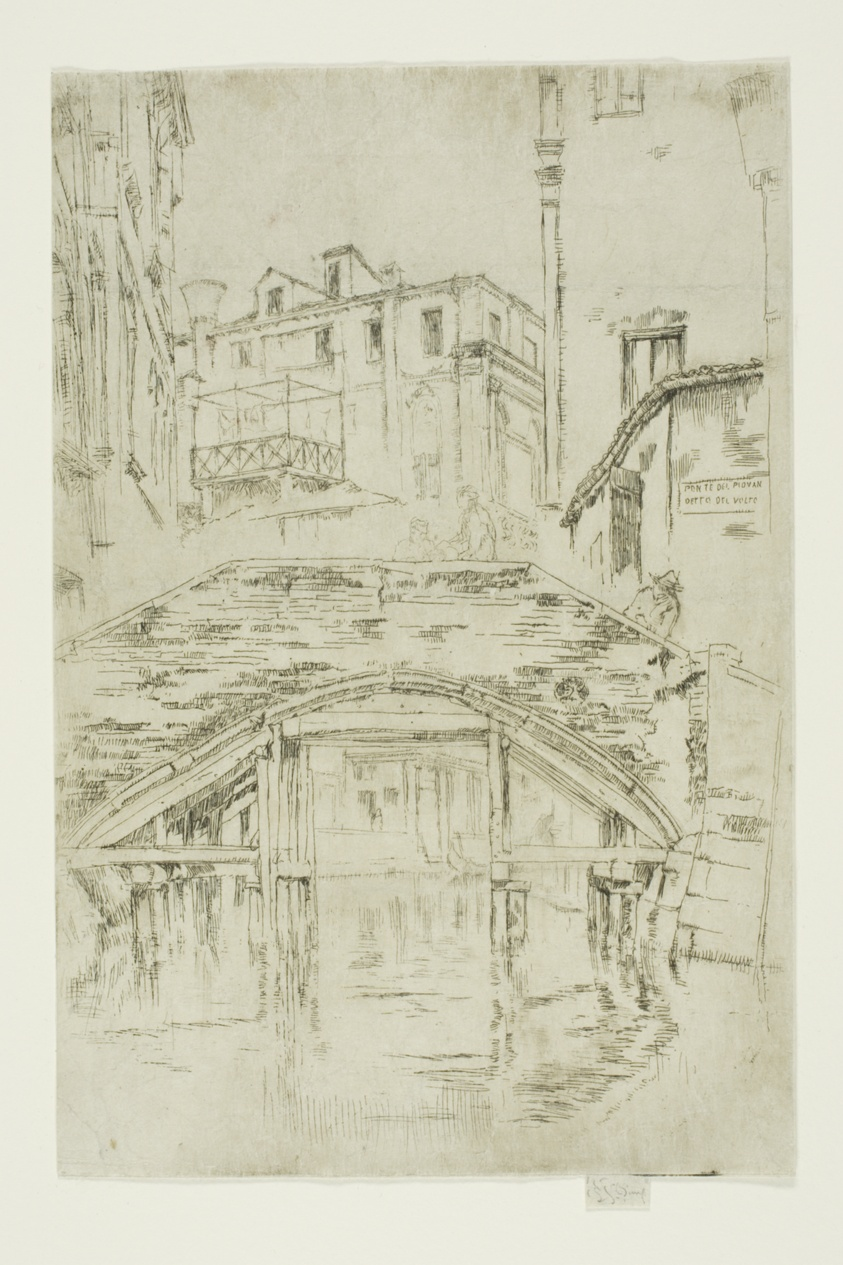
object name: Print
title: Ponte del Piovan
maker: James McNeill Whistler (American, 1834-1903)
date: 1879/80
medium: Etching and drypoint in black ink on off-white Japanese paper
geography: United States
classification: etching; drypoint; print; prints and drawing; paper